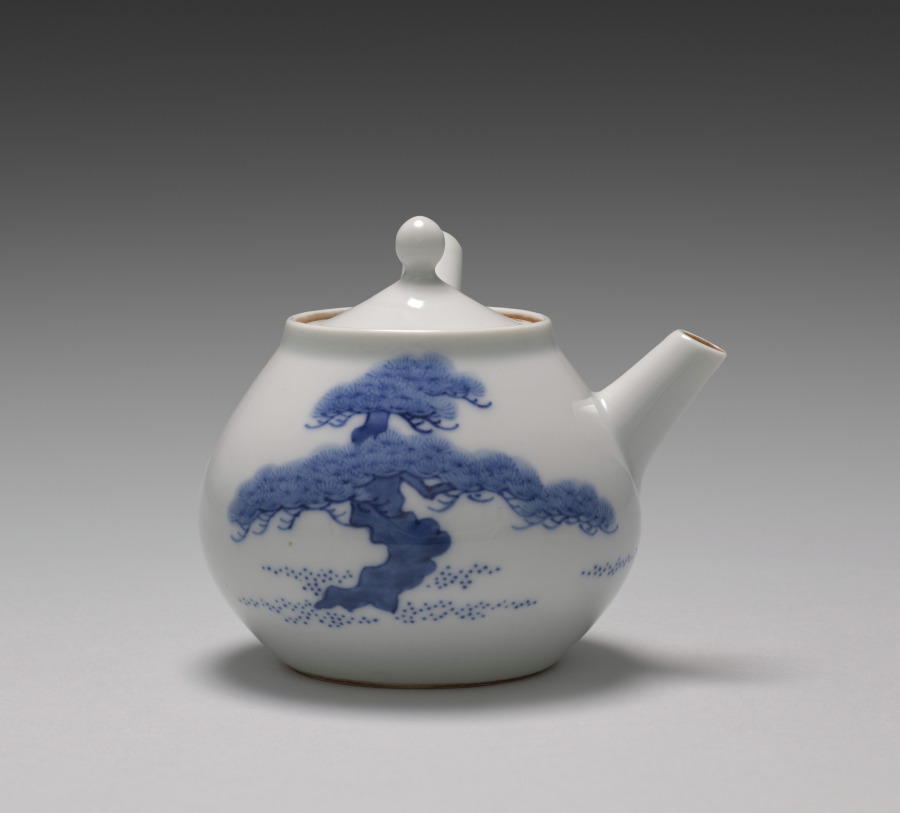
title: Teapot with Pines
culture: Japan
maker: Seifū Yohei III (Japanese, 1851–1914)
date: 1893–1914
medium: Porcelain with underglaze blue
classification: Ceramic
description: Side-handled teapots known as kyūsu and hot water coolers, or yuzamashi, are essential components of sencha tea sets. The teapot is, of course, meant for steeping and serving the tea. Yuzamashi are used to cool boiled water to the ideal temperature for the type of tea to be brewed. This teapot has a pine in underglaze blue on each side. The tip of one of these pines reaches onto the tiny lid, and as with the trees on the Water Cooler with Pines, CMA 2022.163, the trunks are curvy ribbons with little definition. Considering the execution of the two vessels' designs, one might imagine the pot and cooler to have been part of the same set.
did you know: This teapot with images of pines are among Seifū Yohei III’s designs painted in blue.